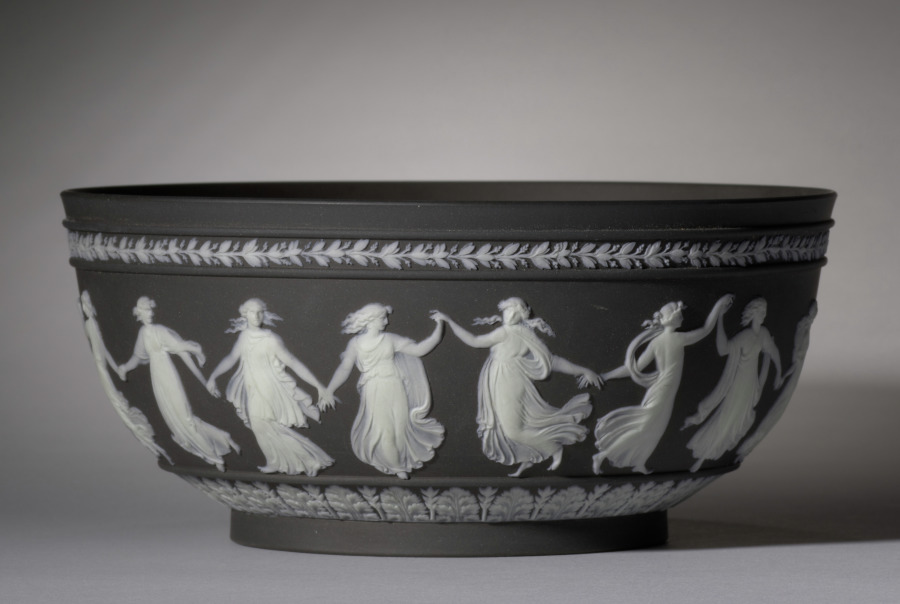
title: Bowl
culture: England, Staffordshire, 19th century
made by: Wedgwood Factory (British)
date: 1800–1850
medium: black basalt ware with applied decorations in white jasper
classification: Ceramic